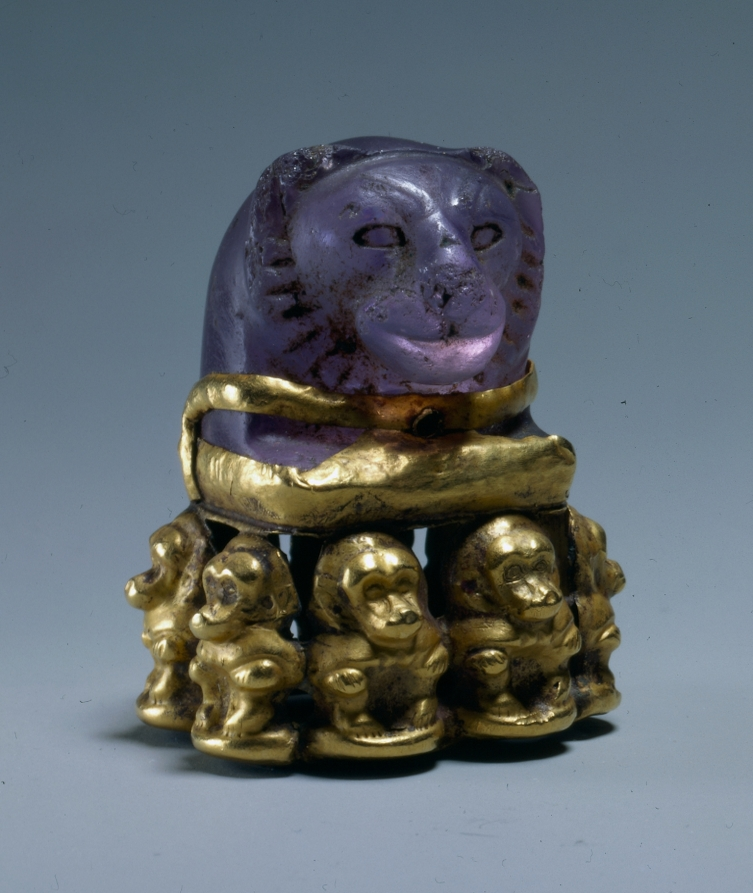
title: Pendant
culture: Sudan, Napatan; lion's head component: probably Egypt, Third Intermediate (1069–715 BCE), Dynasty 25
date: c. 700 BCE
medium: amethyst and gold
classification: Jewelry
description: This pendant consists of two parts: a superbly carved lion’s head in amethyst that has been set into a D-shaped gold base consisting of a platform surrounded by eight seated baboons. The lion’s head is an heirloom from the New Kingdom, most likely a gaming piece that had been adapted in the Napatan period to serve as an pendant amulet. This procedure was fairly common in antiquity as a means of recycling precious stones. The importance of leonine deities in Nubian religion was obviously the motivating force behind the creation of this spectacular ornament.